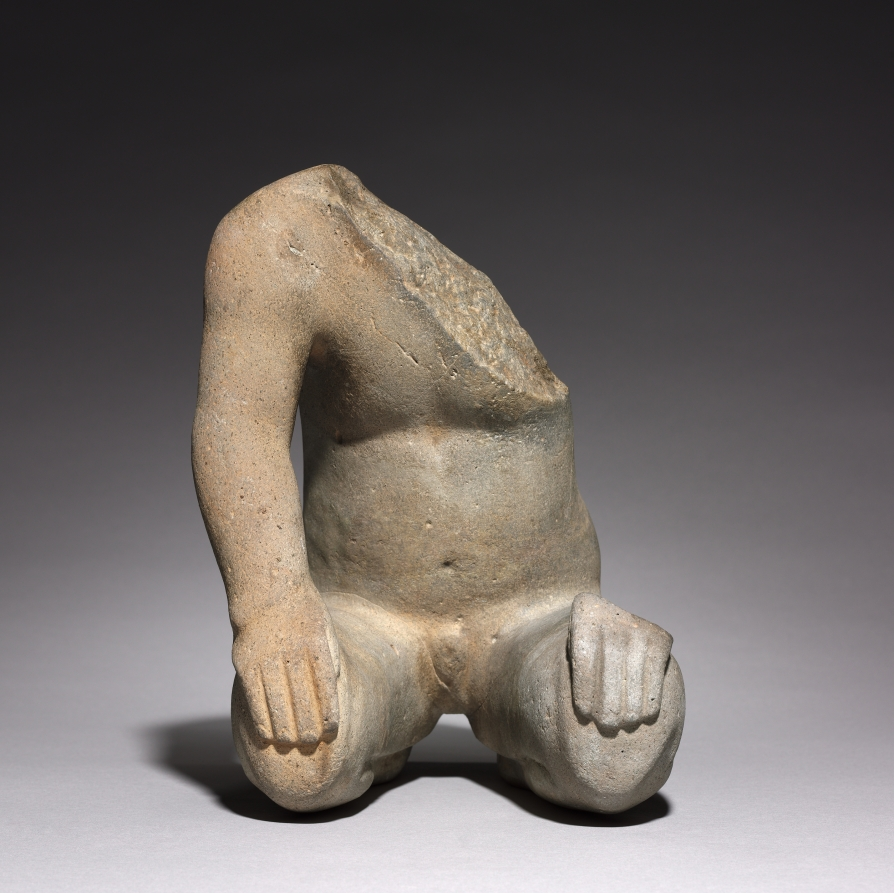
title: Kneeling Figure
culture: Mexico, Guerrero, Olmec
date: c. 1200–600 BCE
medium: stone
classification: Sculpture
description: Outside of the Maya, Olmec sculptures of humans have a naturalism unknown in other Mesoamerican artistic traditions. On this finely carved figure, the musculature of the arms, torso, and legs is carefully depicted, and even the fingernails and toenails and are shown.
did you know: An observant traveler discovered the left knee and hand fragment, orginally missing and now reunited.